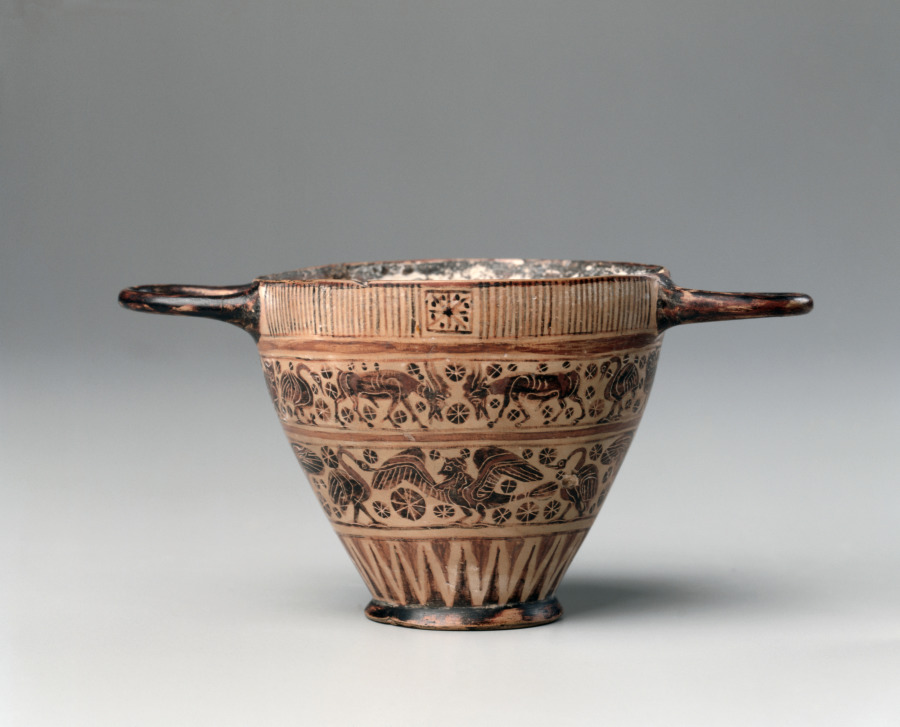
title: Black-Figure Kotyle (Drinking Cup): Animal Friezes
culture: Greek, Corinthian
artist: attributed to Shoe Lane Painter (Greek, early-mid 1900s)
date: 600s–500s BCE, with modern painting and incision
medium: ceramic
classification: Ceramic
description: This vessel began as an authentic drinking cup in the ancient Greek city of Corinth. Originally bearing no figural decoration, it was given new handles and animal friezes in a style recalling that of ancient Corinthian artists. The modern decorator was prolific enough that scholars have recognized their hand, coining the name “Shoe Lane Painter” after a street in Athens where many such vases were sold.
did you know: Although the body of this cup is ancient, its handles and figural decoration are modern.